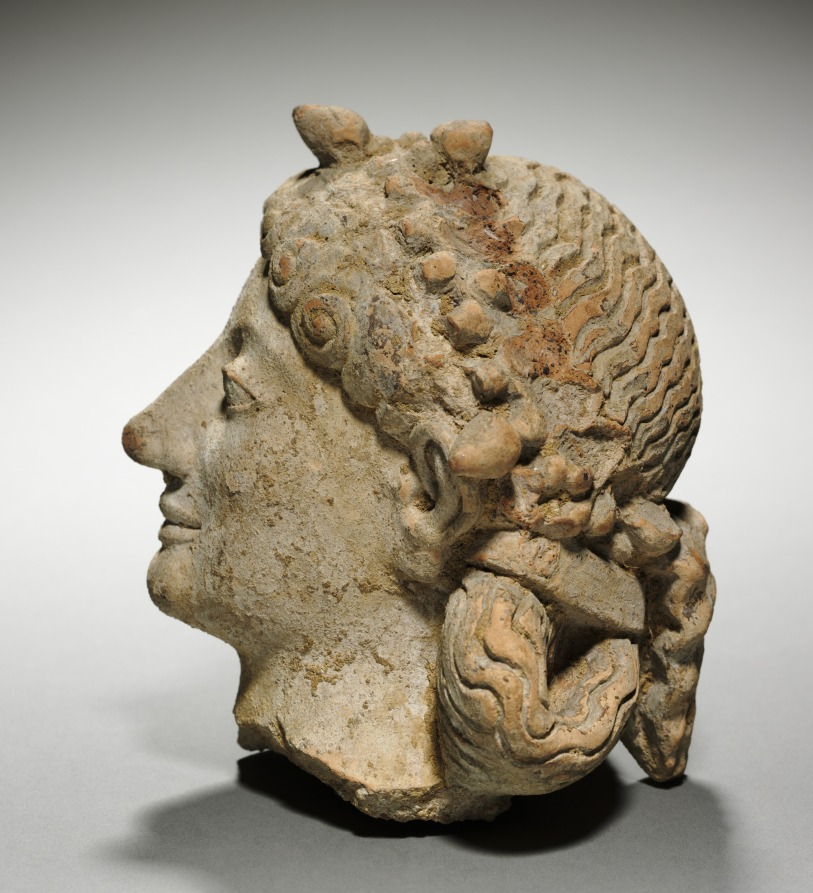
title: Head of Artemis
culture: Greece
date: 600–575 BCE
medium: terracotta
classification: Sculpture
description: Artemis was the goddess of hunting. Her long straight nose, almond-shaped eyes, and "archaic smile" are very similar to those of Atalanta on the contemporary white-ground lekythos (1966.114)